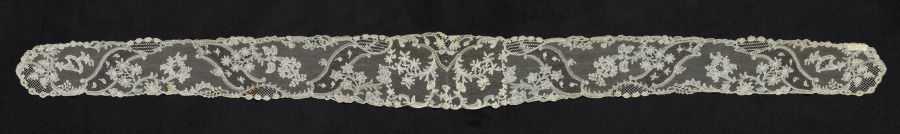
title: Lace Lappet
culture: Belgium, Brussels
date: early 1700s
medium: Bobbin lace (Point d'Angleterre)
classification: Lace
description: Based on its design, this lace lappet can be dated to early in the reign (1715–1774) of Louis XV.